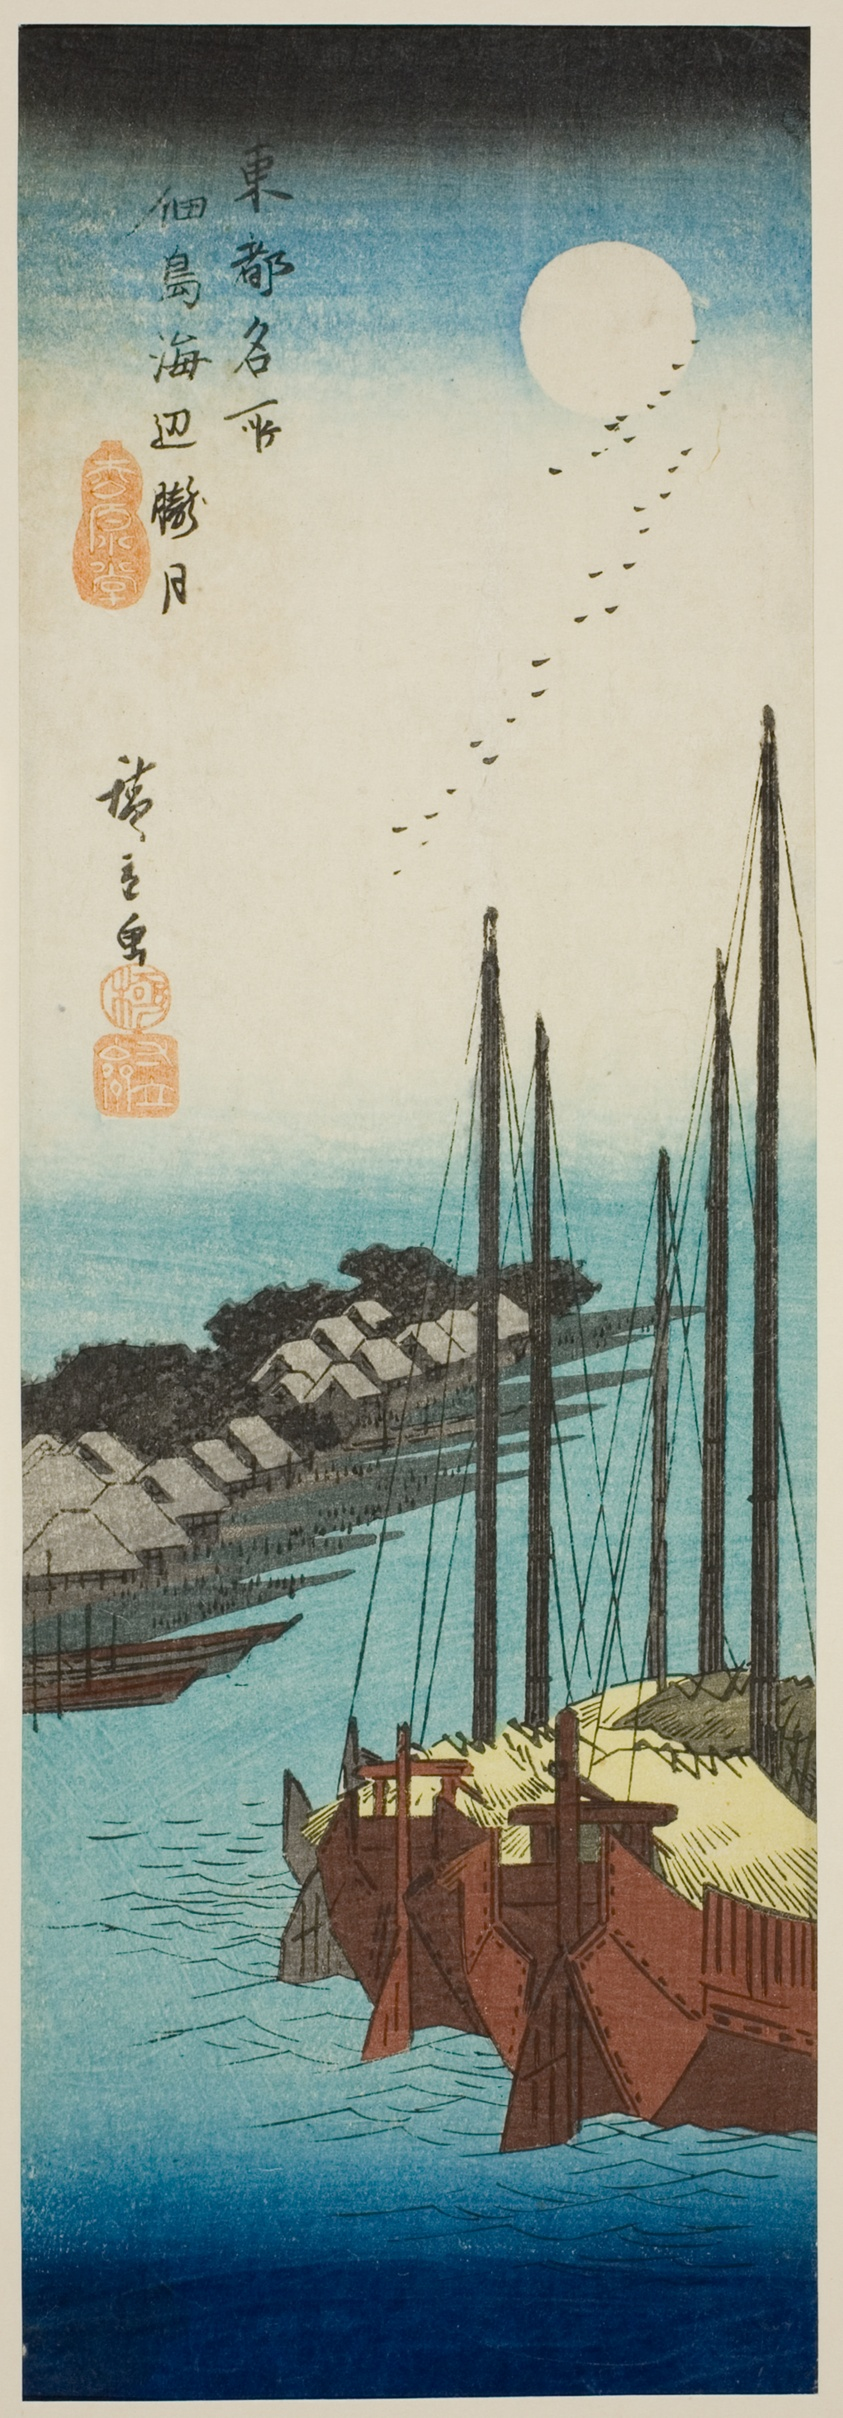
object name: Print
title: Misty Moont over the Shore at Tsukuda Island (Tsukudajima kaihen oborozuki), from the series "Famous Places in the Eastern Capital (Toto meisho)"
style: Japanese (culture or style)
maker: Utagawa Hiroshige 歌川 広重; Japanese, 1797-1858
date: c. 1835/44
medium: Color woodblock print; chutanzaku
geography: Japan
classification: woodblock print; print; asian art